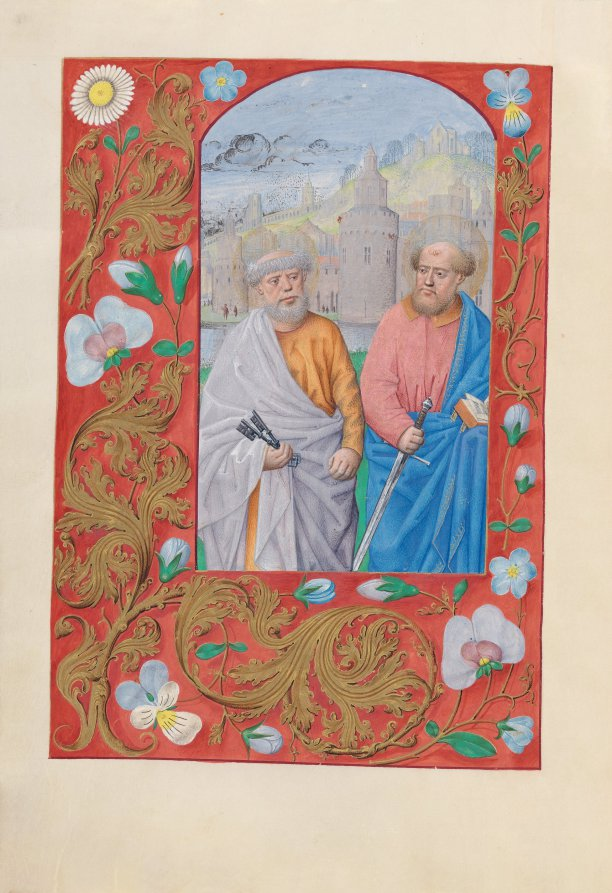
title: Hours of Queen Isabella the Catholic, Queen of Spain: Fol. 173v, Saints Peter & Paul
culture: Flanders, Ghent and Bruges, late 15th century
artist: Master of the First Prayerbook of Maximillian (Flemish, c. 1444–1519)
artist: and Associates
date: c. 1500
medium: ink, tempera, and gold on vellum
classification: Bound Volume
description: This manuscript was illuminated by a circle of at least five highly organized manuscript painters active in the Flemish cities of Ghent and Bruges. The principal illuminator was Alexander Bening, who painted the majority of the book's miniatures. Manuscripts produced by this circle of artists are renowned for the decoration of their borders, which typically feature a rich variety of realistically-painted flowers, birds, and butterflies. This prayer book, called a book of hours, was intended not for a cleric, but for the private devotions of a lay person-in this case, Isabella the Catholic, Queen of Spain (1451-1504). Isabella's coat of arms embellishes the book's frontispiece. It is unlikely that the book was commissioned by the Queen herself; rather, she probably received it as a diplomatic gift from someone courting her patronage, perhaps Cardinal Francisco Jimenez de Cisneros. A Franciscan friar, Jimenez was dependent upon Isabella for his advancement, first to the post of Queen's confessor in 1492, and then to Archbishop of Toledo in 1495.